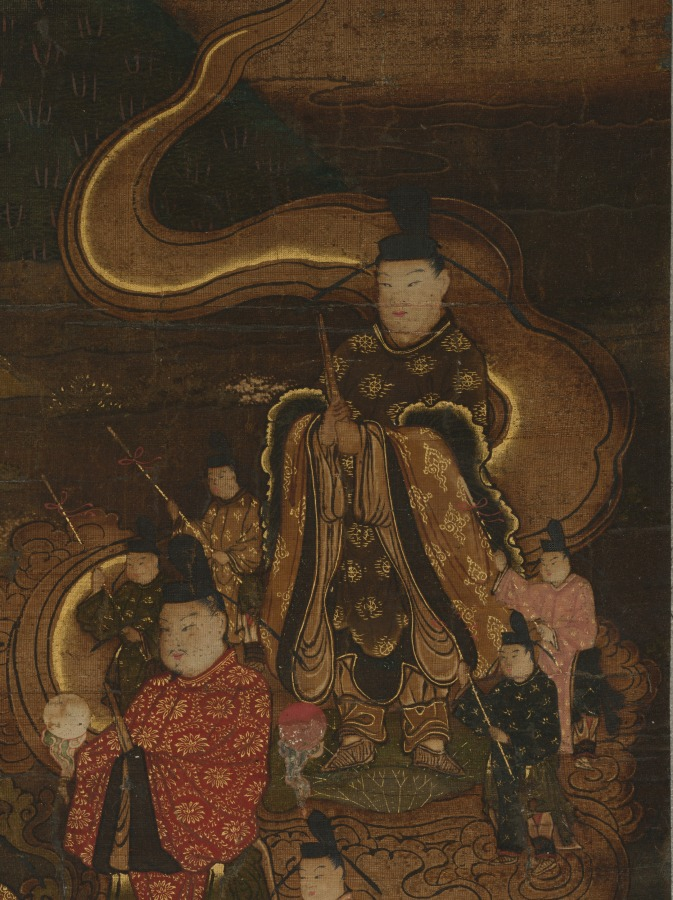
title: Descent of the Nine Luminaries and the Seven Stars at Kasuga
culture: Japan, Nanbokuchō period (1336–92)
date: mid- to late 1300s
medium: Hanging scroll; ink, color, gold and cut gold on silk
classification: Painting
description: This medieval religious painting shows celestial beings descending from the heavens into the Kasuga Shrine, a major religious site in Japan's ancient capital, Nara. The moon and the Kasuga mountain range appear in the uppermost portion of the painting, as does a red shrine entrance gate, or torii. In the upper part of the painting, figural representations of the stars in the constellation known as the Big Dipper in the West descend from right to left on cloud banks. In the lower part, the Nine Luminaries (Sanskrit: Navagraha) that emerged from the Vedic tradition—the sun and moon; the planets Jupiter, Mars, Saturn, Venus, and Mercury; and personifications of the fluctuating lunar nodes—descend in similar fashion. The painting uses the "deities in descent" scheme originating in China, as well as the original Buddhist form mandala (Japanese: honjibutsu mandarazu) format prevalent in medieval Japanese Shinto-Buddhist painting, to generate an image connected to the worship of celestial bodies in Esoteric Buddhism.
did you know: A 19th-century copy of this painting in ink and light color exists at the Kyoto City University of Arts.